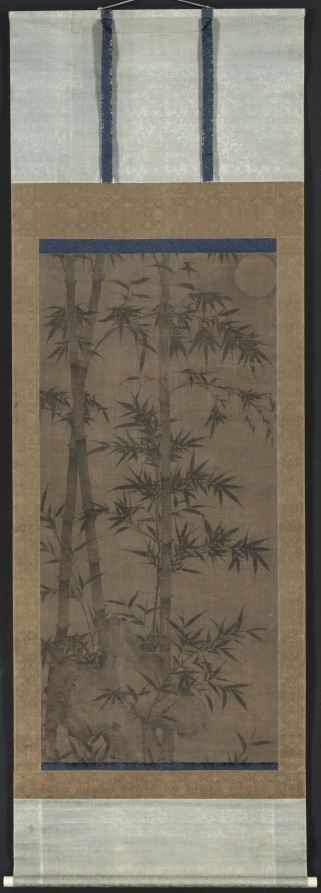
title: Bamboo in Four Seasons: Spring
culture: China, Yuan dynasty (1271-1368)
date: 1279–1368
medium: hanging scroll, ink on silk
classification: Painting